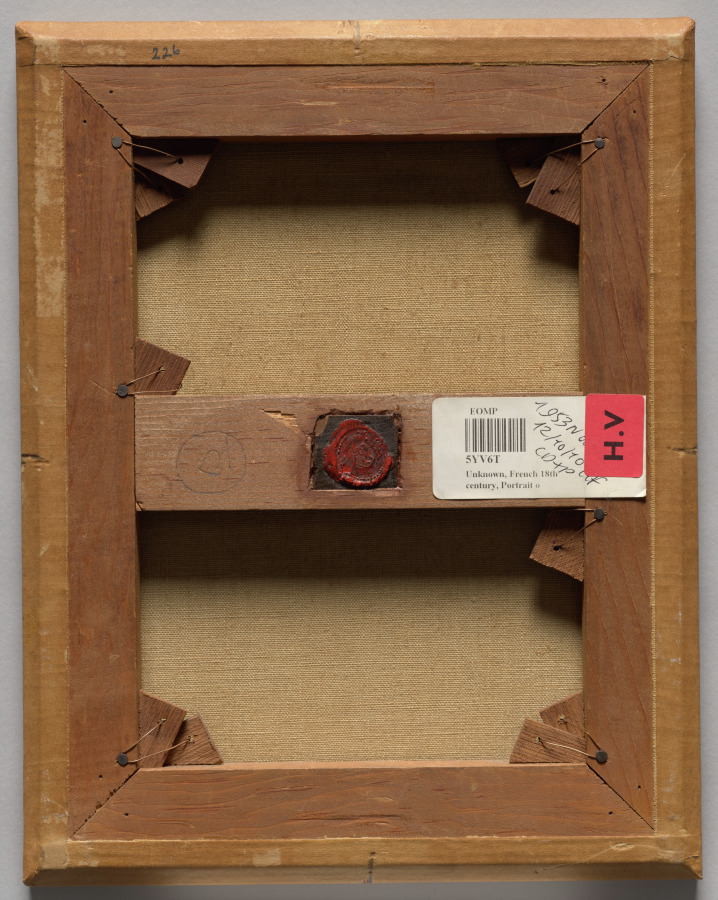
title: Head of a Young Woman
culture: France, 18th century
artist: François Boucher (French, 1703–1770)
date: early 1730s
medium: oil on canvas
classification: Painting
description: This work was catalogued as "style of Chardin" when it entered the museum's collection, and was considered a minor rococo revival work of the 1800s. In 2011, the museum asked Alastair Laing, the leading scholar of the artist Boucher, to study it. He confirmed that the painting is a rare survival from the artist's early career—one of only two known oil studies of this type by the artist.